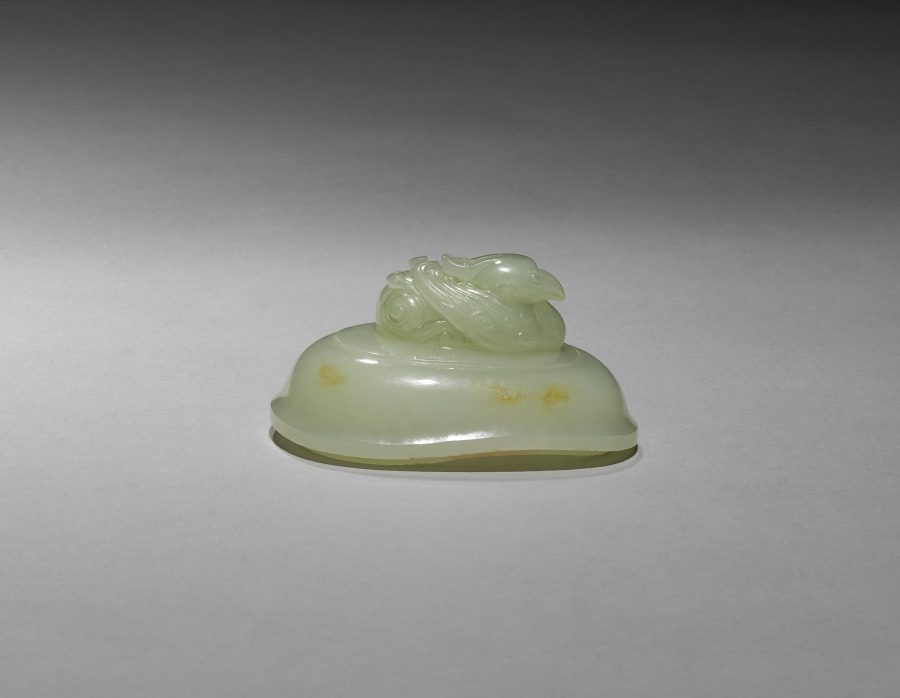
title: Pitcher (Gong) with Dragon and Bird-Headed Handle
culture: China, Qing dynasty (1644–1911)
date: 1700s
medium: pale greenish-white jade with brown markings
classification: Jade